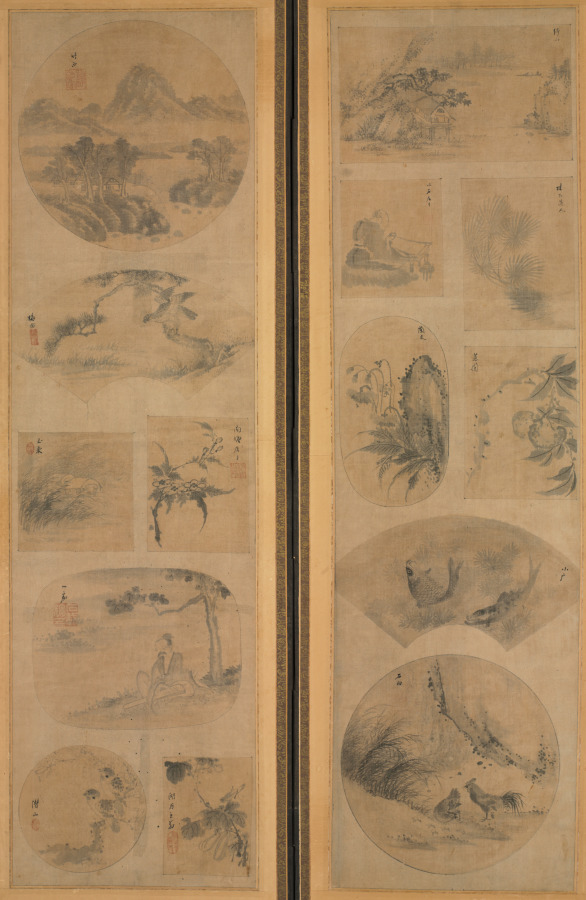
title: Painting of One Hundred Themes (obverse)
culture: Korea, Joseon dynasty (1392–1910)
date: late 1800s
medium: Ten-panel folding screen affixed with album leaves (obverse), calligraphy (reverse), ink and color on silk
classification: Painting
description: This screen depicts paintings on one side and poems on the other—an economical format often used in Korea to allow the viewer to enjoy both sides of one screen. The front features an assortment of bird-and-flower, landscape, and figural paintings executed according to the brush manner of more than 50 artists. A calligrapher has brushed several Chinese poems about the four seasons on the reverse side, among them "Composing in the Daytime of Summer" by Tang poet Liu Zongyuan (773–819) and "Composing when Spring Begins" by Song scholar Zhang Shi (1133–1180).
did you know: Depicting small images of various subjects became one of the most popular types of painting toward the end of the 19th century.